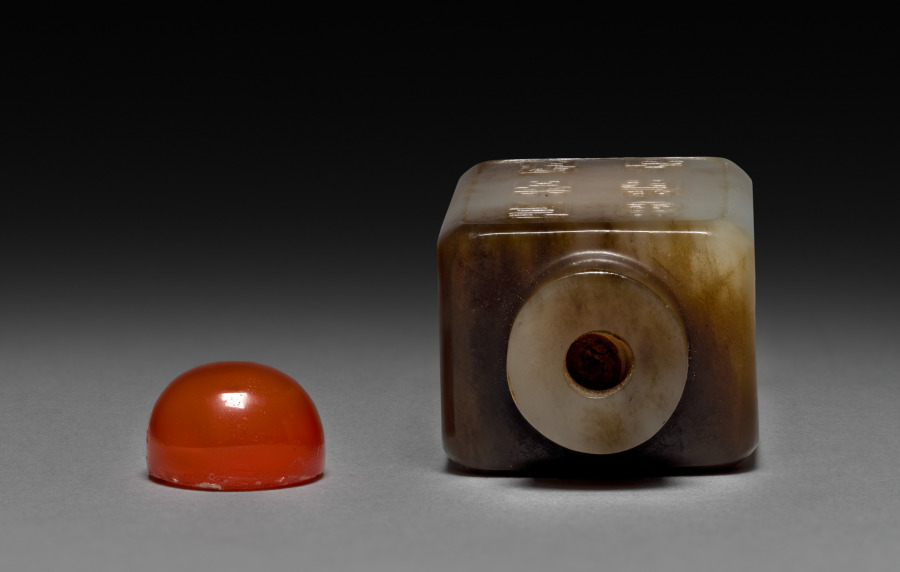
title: Snuff Bottle with Stopper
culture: China, Qing dynasty (1644–1911), Qianlong reign (1736–95)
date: 1736–95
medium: jade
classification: Jade